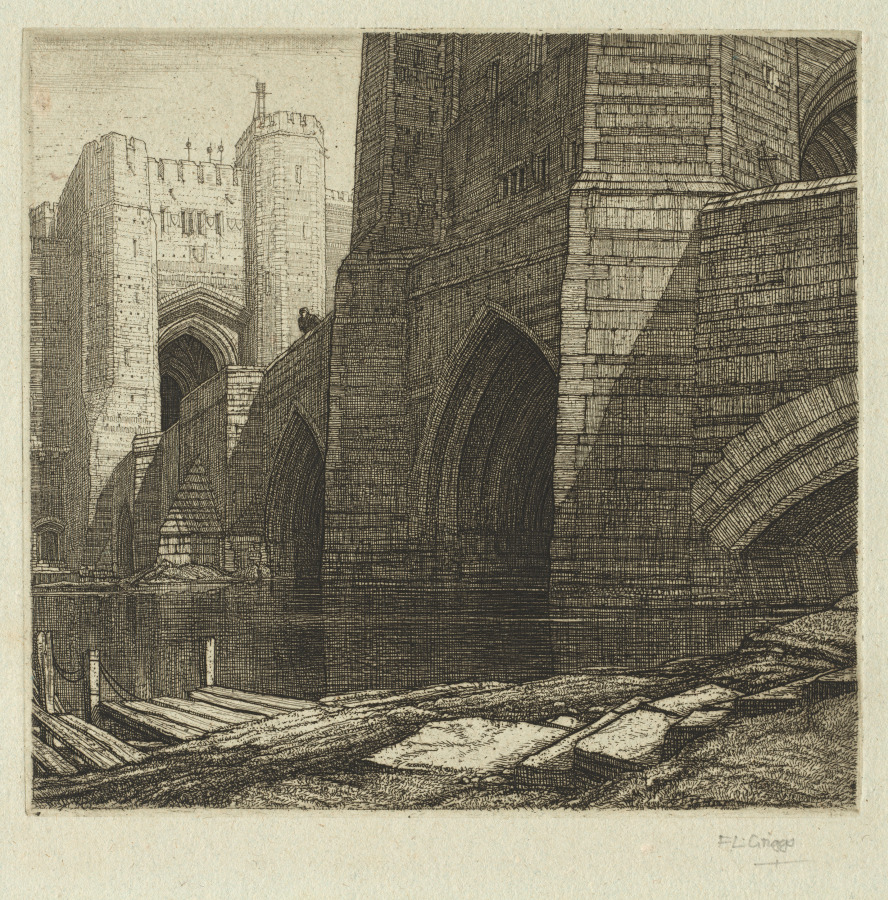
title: The Barbican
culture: England, 20th century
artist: Frederick Landseer Maur Griggs (British, 1876–1938)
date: 1920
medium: etching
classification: Print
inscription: signed and lower right in pencil, F. L. Griggs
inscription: lower right, below image: FL Griggs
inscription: lower left corner: plate destroyed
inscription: lower right corner: The Barbican / 3rd final state / 29 proofs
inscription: lower margin, stamped: F.L. Griggs, England, Lugt No. 760a.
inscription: orange stamp: a cross with a backwards 'D' to its left, and a backwards 'P' to its right